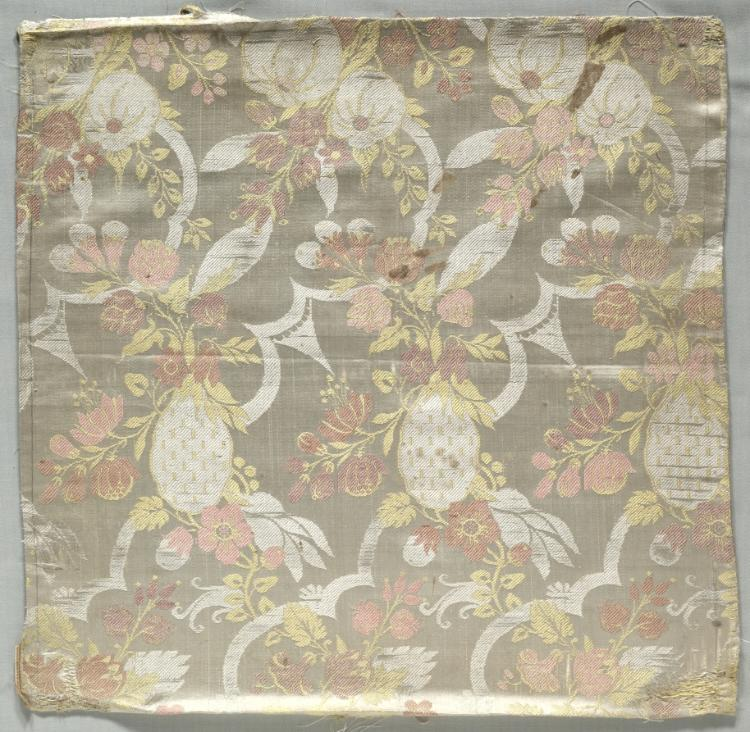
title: Silk Panel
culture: Italy, 18th century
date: 1700s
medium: plain compound satin weave; silk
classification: Textile